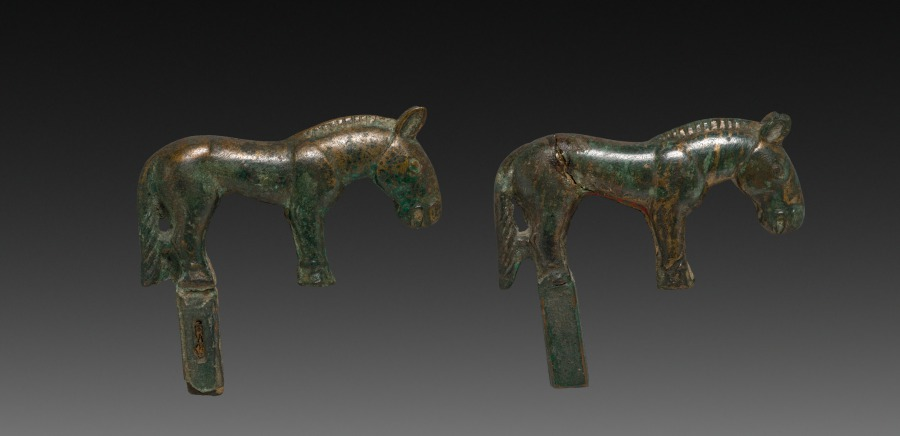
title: Pair of Wild Horses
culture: China, Ordos Region, Han dynasty (202 BCE–220 CE)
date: c. 100 BCE–100 CE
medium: cast bronze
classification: Sculpture